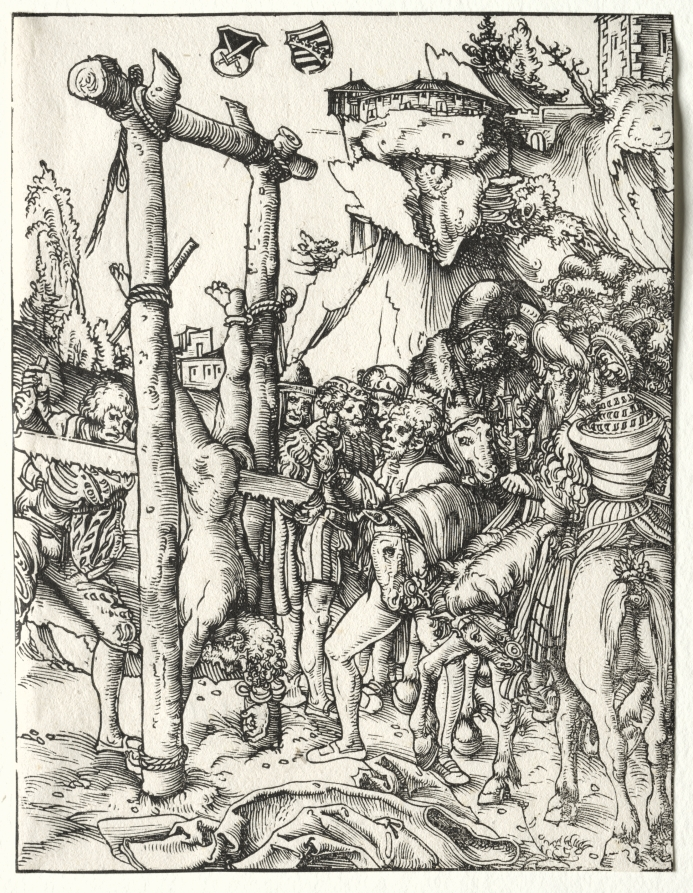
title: Martyrdom of St. Simeon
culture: Germany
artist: Lucas Cranach (German, 1472–1553)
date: c. 1510/15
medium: woodcut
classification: Print